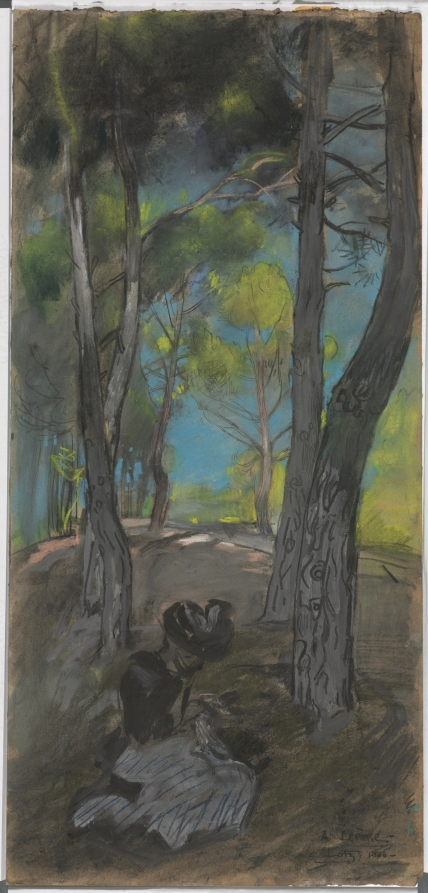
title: Lotz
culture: France, 20th century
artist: Auguste Louis Lepère (French, 1849–1918)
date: 1900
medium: pastel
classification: Drawing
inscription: inscribed in black pastel, lower right: "Lepère / Lotz 1900"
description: Although celebrated as the leader of the creative revival of wood engraving in late 19th-century France, Lepère was also a painter who used pastel to make studies directly from nature. This study of a woman sewing is inscribed to the artist’s friend, Lotz-Brissonneau, who in 1905 authored the catalogue raisonné of Lepère’s graphic work.